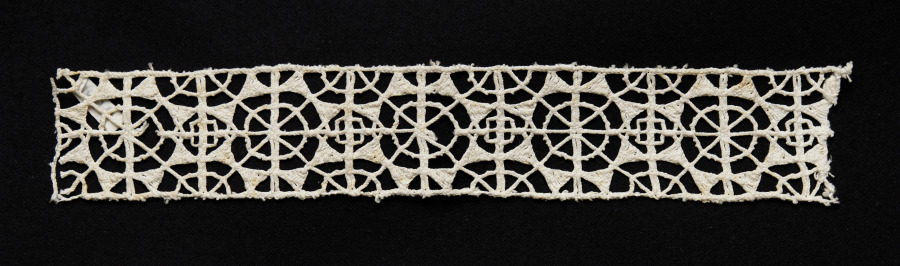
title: Lace Insertion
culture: Italy, Genoa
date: 1550–99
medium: Bobbin lace (needle lace, cutwork [punto tagliato] design)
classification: Lace